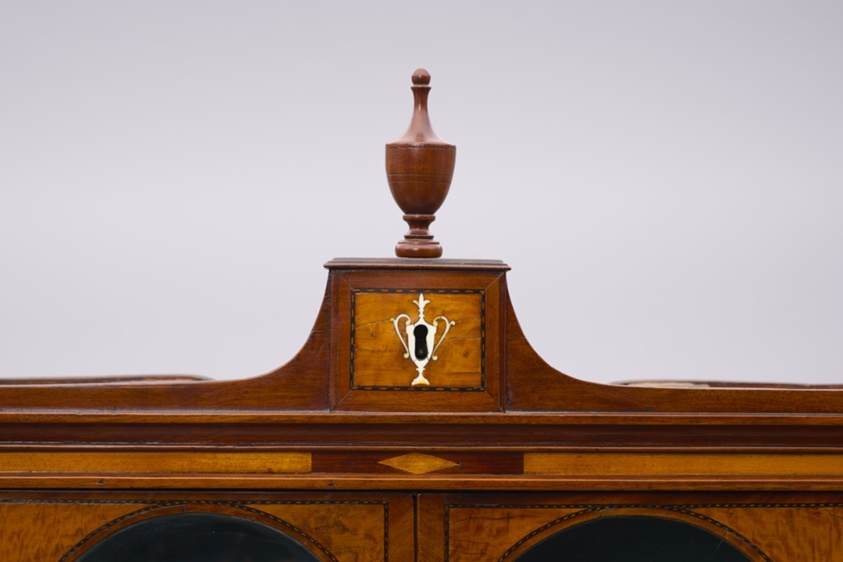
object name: Furniture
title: Tambour Desk and Bookcase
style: federal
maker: Attributed to the workshop of John and Thomas Seymour (American, active 1793–1804); Or attributed to the workshop of Thomas Seymour (American, active 1804–1817); Boston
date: c. 1800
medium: Mahogany, satinwood, white pine, cherrywood, chestnut, with brass, ivorine, and leather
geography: Boston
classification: furniture; american arts; american decorative arts; bookcase; decorative arts; desk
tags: furniture, cabinets, shelves, drawer, locks, keys, bookcase, decorative arts, desk, escutcheons